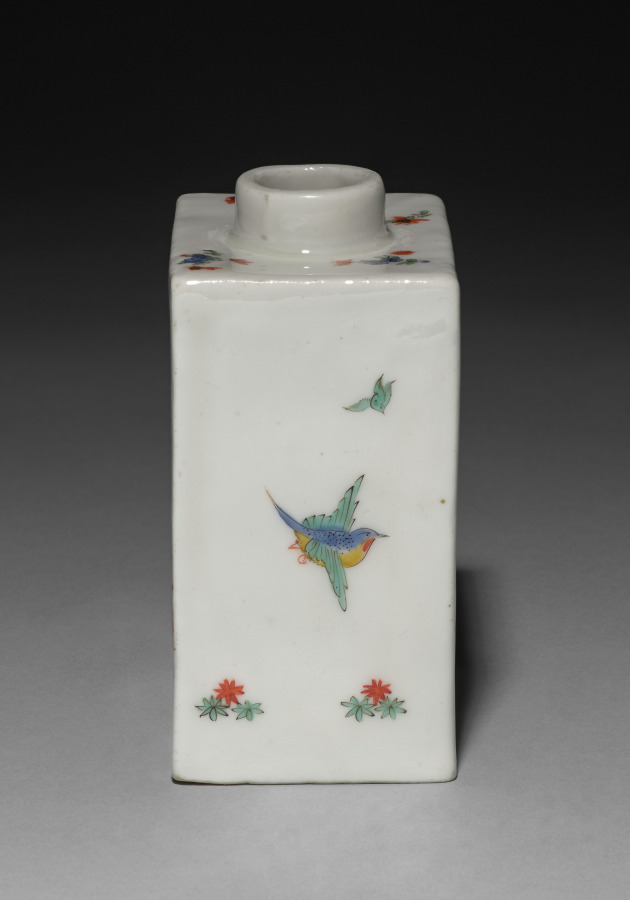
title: Tea Caddy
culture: Germany, Meissen, 18th century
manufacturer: Meissen Porcelain Factory (German, est. c. 1710)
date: c. 1735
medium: porcelain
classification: Ceramic